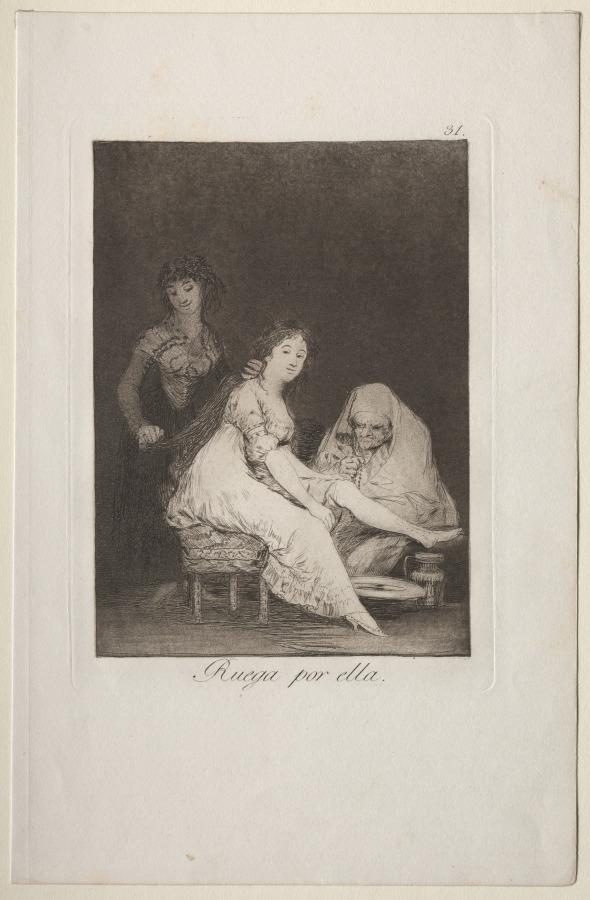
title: She Prays for Her, Plate 31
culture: Spain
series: Los Caprichos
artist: Francisco de Goya (Spanish, 1746–1828)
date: 1799 (printed c. 1855)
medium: etching and aquatint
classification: Print